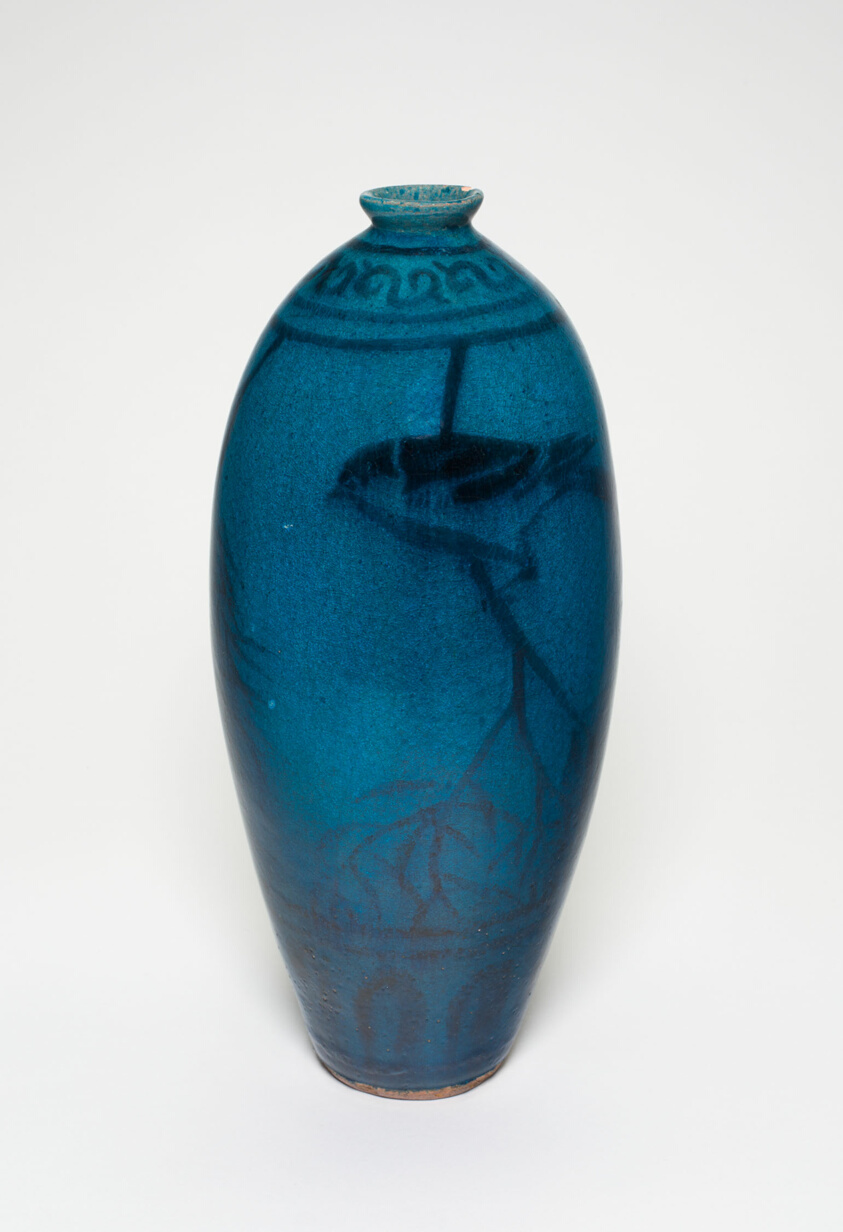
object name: Vessel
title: Vase with Bird on a Branch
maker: China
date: Yuan dynasty (1279–1368)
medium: Stoneware with dark turquoise and black glazes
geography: China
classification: ceramics; asian art; vessel